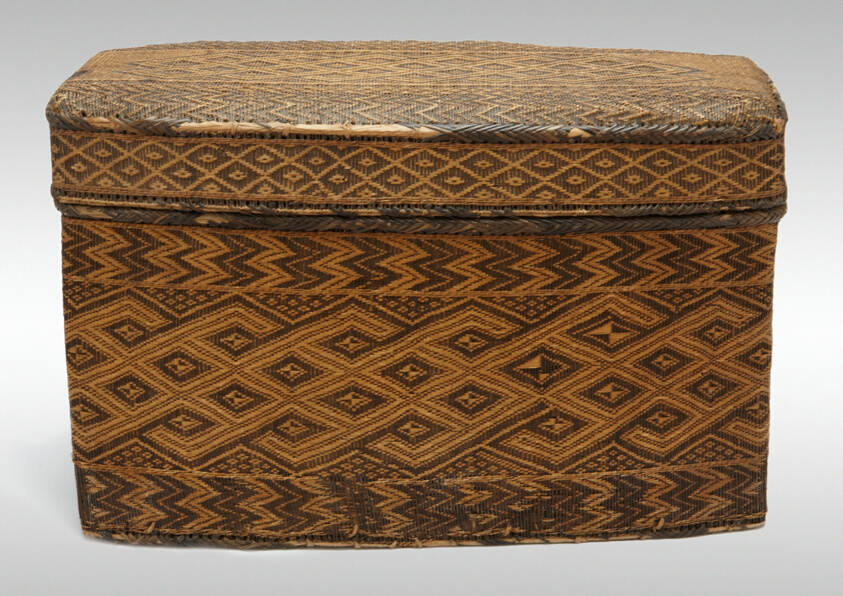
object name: Basketry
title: Container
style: Central Africa, Arts of Africa, african Art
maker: Kongo; Angola, Democratic Republic of the Congo, or Republic of the Congo; Central Africa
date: 18th/19th century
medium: Rattan, wood, and twine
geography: Angola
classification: container; arts of Africa; basketry; african art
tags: basketry, storage, geometric, household, luxury